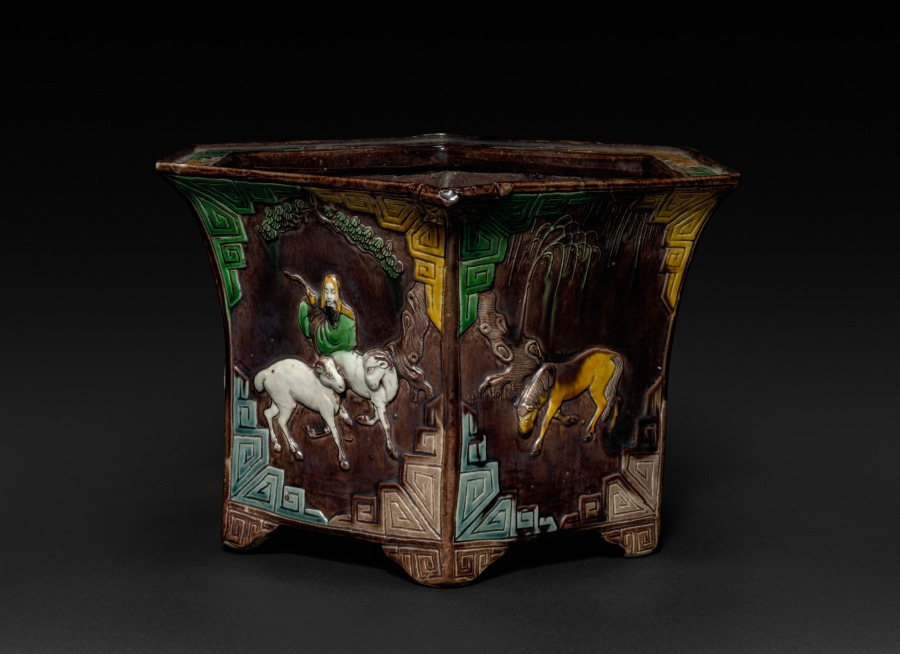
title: Cachepot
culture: China, Qing dynasty (1644-1911), Kangxi reign (1661-1722)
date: 1662–1722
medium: porcelain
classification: Ceramic